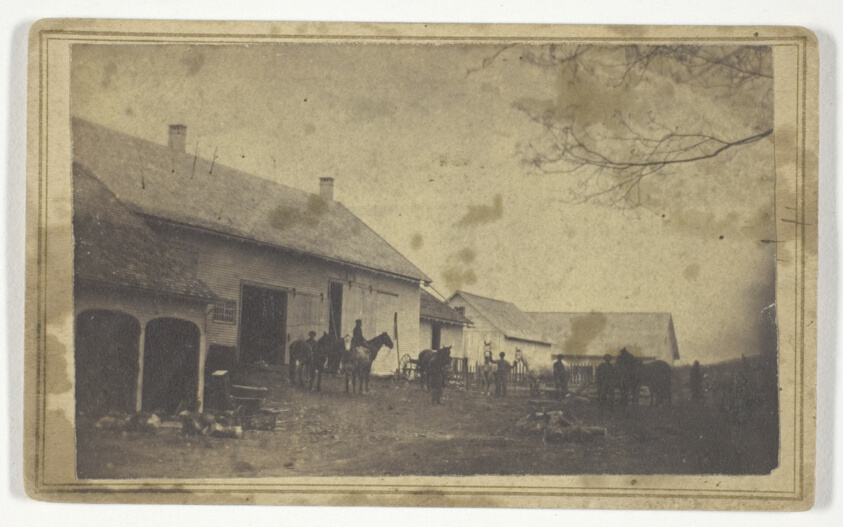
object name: Photograph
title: Untitled (barn exterior)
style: 19th century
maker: Harwood & Stone; American, 19th century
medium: Albumen print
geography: United States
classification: photographic process; photography; card photographs; photograph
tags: Collected by Hugh Edwards